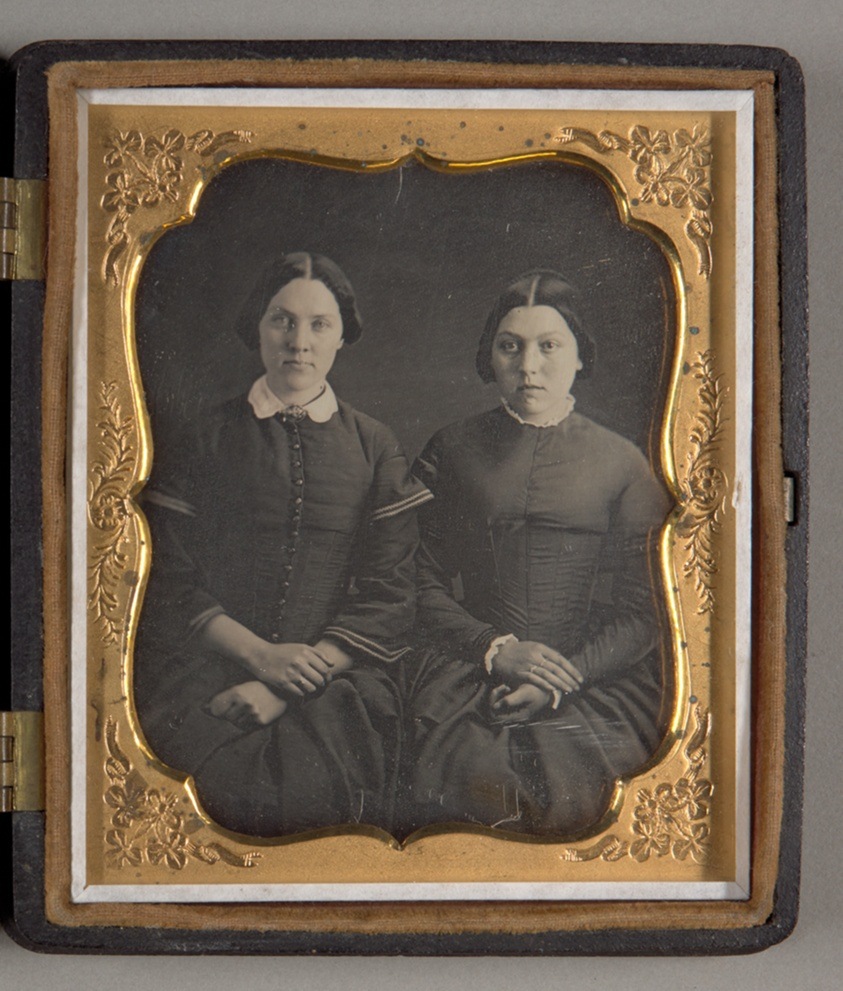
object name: Photograph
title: Untitled (Two Women)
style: 19th century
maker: Artist unknown; 19th century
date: 1839/60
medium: Daguerreotype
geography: Unknown Place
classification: daguerreotype; photographic process; photography; photograph